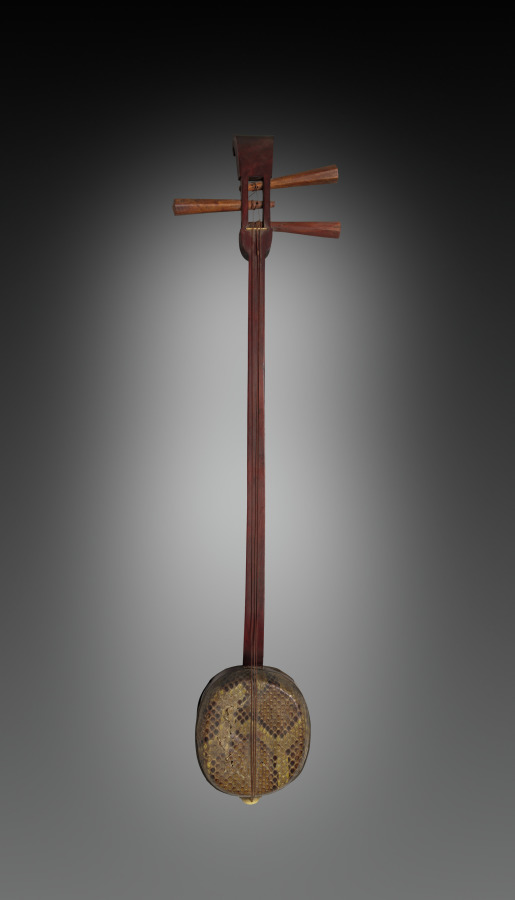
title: Sanxian (Three-Stringed Guitar)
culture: China, Qing dynasty (1644-1911)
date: 1800s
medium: wood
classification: Musical Instrument